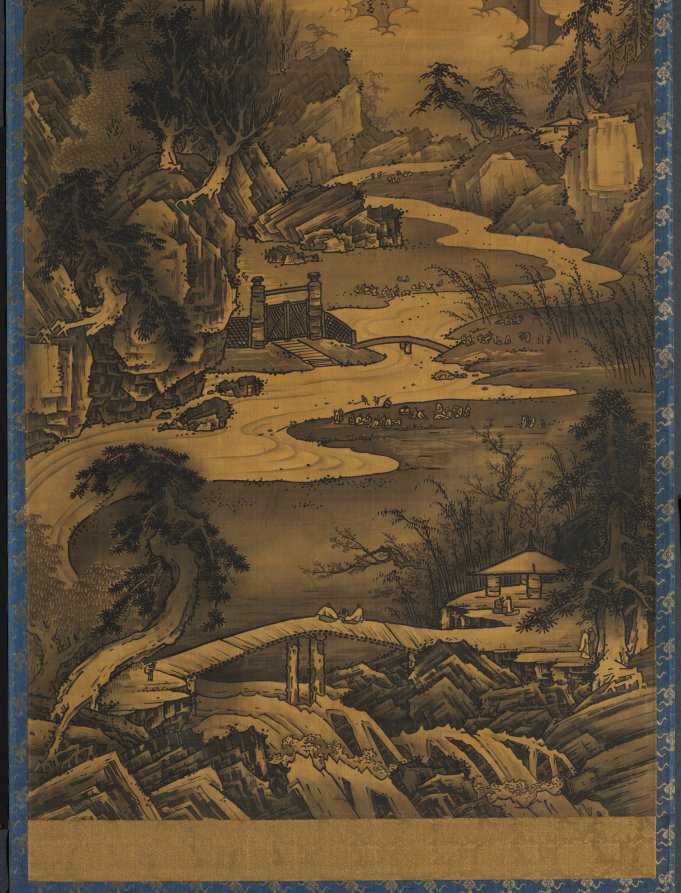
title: Orchid Pavilion Gathering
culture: Japan, Edo period (1615–1868)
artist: Soga Shōhaku (Japanese, 1730–1781)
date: 1777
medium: hanging scroll; ink on silk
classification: Painting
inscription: Inscribed upper right: Sixth year of An'ei (1777) mid-winter, Soga Shohaku Seal: Dasokken Shohaku Seal: Unread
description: This painting depicts a famous gathering that took place in China in AD 353 to celebrate the Spring Purification Festival, also known as the Double Third Festival, as it takes place on the third day of the third lunar month. The host invited everyone to the Orchid Pavilion to compose poetry and drink wine. Guests floated wine cups down a nearby creek, and where they landed, people had to drink the wine and compose a poem.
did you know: The Buddhist temple Bairinji in Kurume City, Fukuoka prefecture, Japan, and the National Gallery of Victoria in Melbourne, Australia, own compositions by the same artist on the same theme.